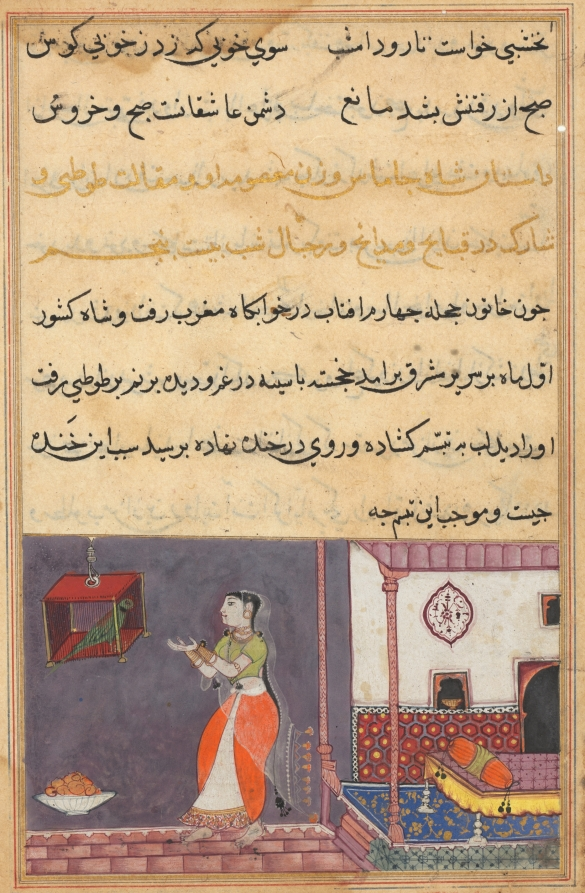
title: The Parrot Addresses Khujasta at the Beginning of the Twenty-fifth Night, from a Tuti-nama (Tales of a Parrot)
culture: Mughal India, court of Akbar (reigned 1556–1605)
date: c. 1560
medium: gum tempera, ink, and gold on paper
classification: Painting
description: Khujasta stands in front of a porch with a blue arabesque carpet and footed bed. The empty bed speaks to her loneliness and longing for a lover. She is dressed as an Indian woman, with backless blouse, orange wrapped skirt, and a long sash. The pompom fringe of her translucent, muslin stole stands out in a vertical row.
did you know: Pink sandstone was a favored building material around the region of Delhi and Agra in northern India.